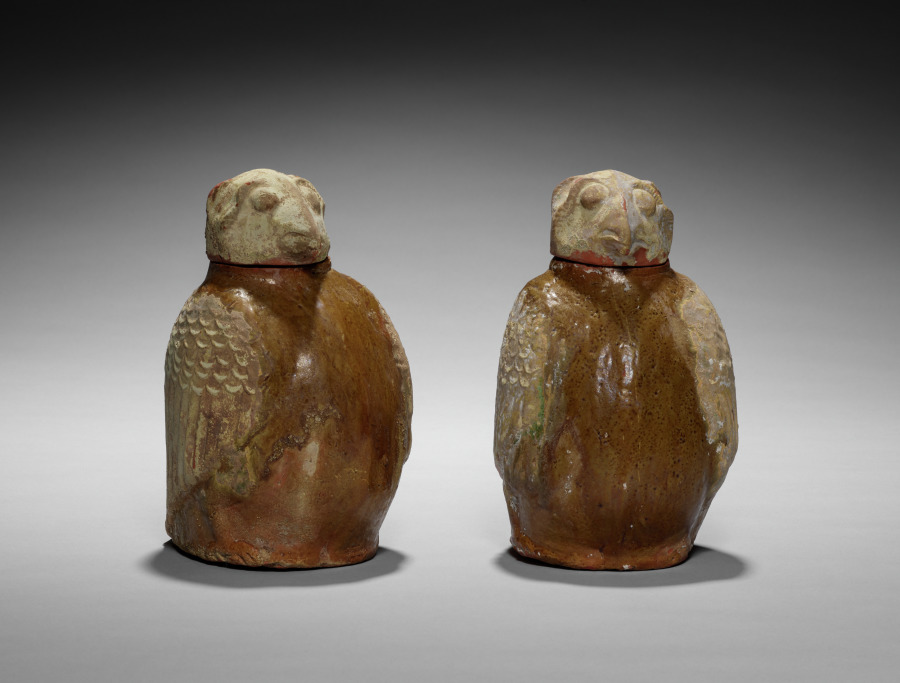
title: Pair of Owl-shaped Jars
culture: China, Henan province, Western Han dynasty (206 BCE–8 CE)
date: 206 BCE–9 CE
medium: Amber-brown glazed low-fired pottery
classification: Ceramic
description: Pottery vessels in the shape of owls were made since Neolithic times and throughout the Bronze age. These jars in the form of vigilant owls may have provided a tomb occupant with grain in the afterlife. However, the meaning of these mysterious birds and the association of the owl motif with burial sites in China is not fully understood.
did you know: Each jar cover is modeled in the shape of an owl's head.